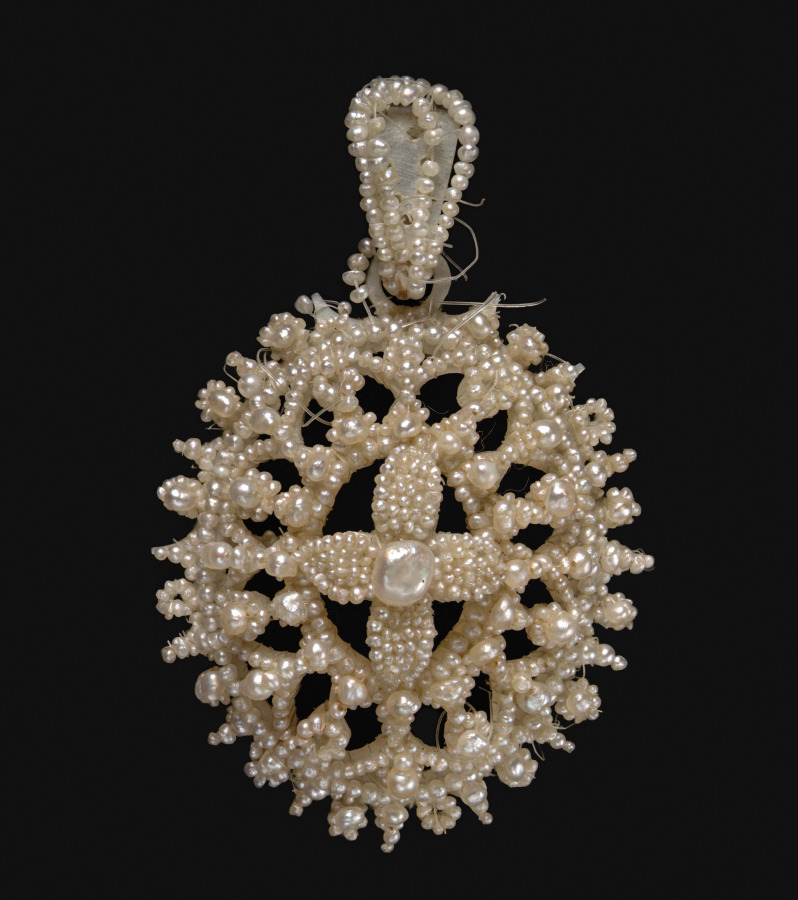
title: Pendant (Parure)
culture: England, 19th century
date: c. 1850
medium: seed pearl on mother-of-pearl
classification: Jewelry